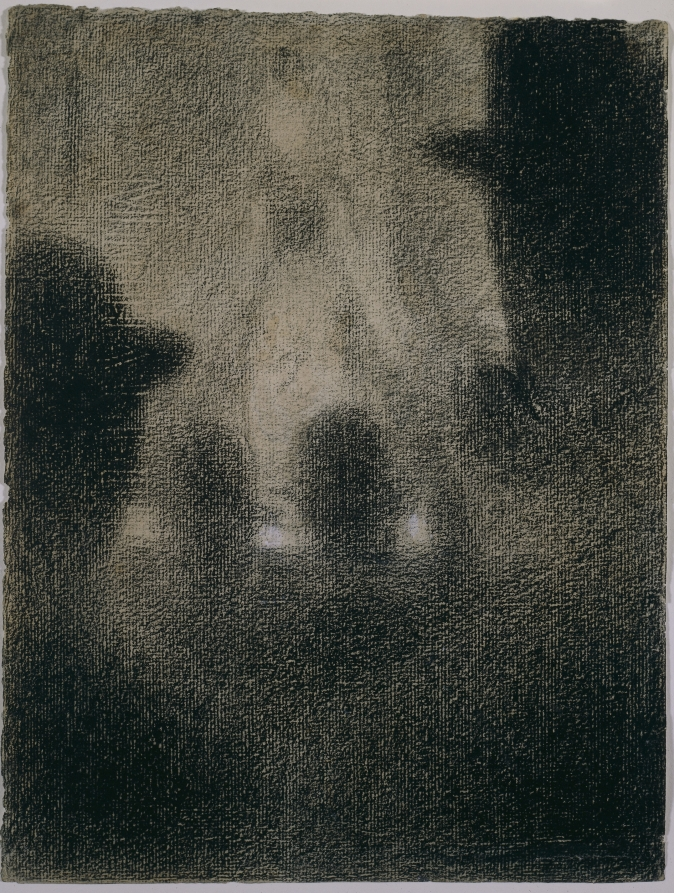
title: At the Concert Parisien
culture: France, 19th century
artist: Georges Seurat (French, 1859–1891)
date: 1887–88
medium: conté crayon heightened with white chalk on cream handmade modern laid paper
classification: Drawing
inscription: inscribed on verso, at bottom, in blue crayon: G. Seurat / L (?) [upside down]; on verso, right center, in red crayon: 299 [posthumous inventory number]; watermark, upper left: MICHALLET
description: Café-concerts were popular places of entertainment for the middle classes in Paris during the late 1800s and usually featured singers or other forms of vaudeville entertainers. Georges Seurat created eight drawings depicting café-concerts, some showing known establishments. This drawing has an innovative viewpoint, in which we peer through the bowler hats of male viewers listening to a female singer on stage. Seurat typically used a black crayon manufactured by the Conté company, and its waxy quality allowed him to exploit the texture of paper to striking effect.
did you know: Despite Georges Seurat's brief lifespan, he created a large number of drawings, working almost exclusively with the waxy Conté crayon and textured paper used for this sheet.